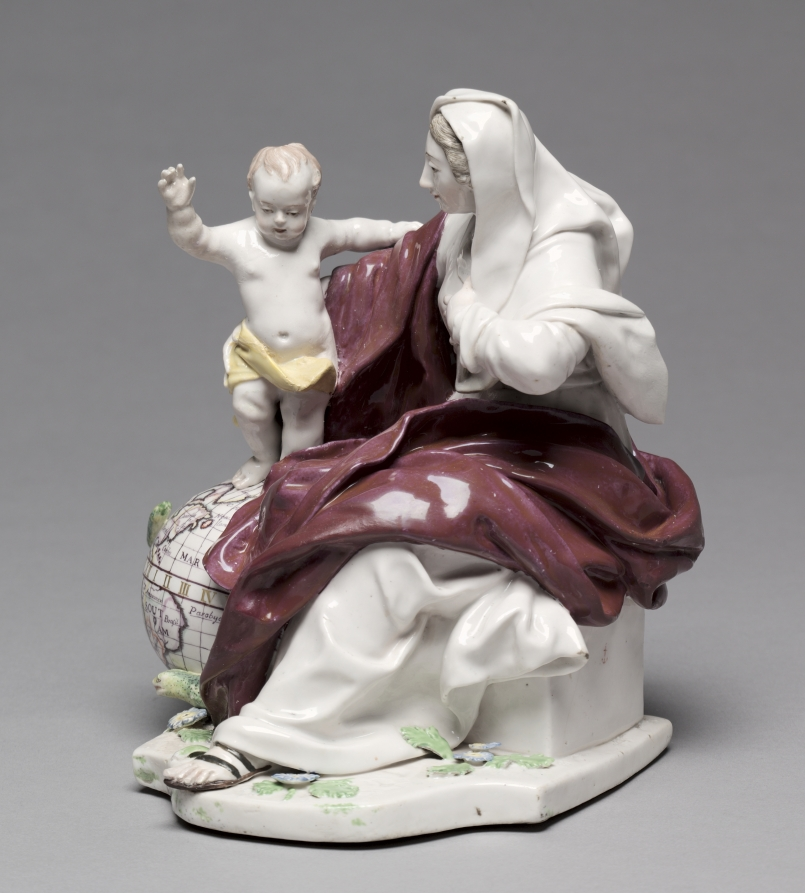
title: Madonna and Child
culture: England, Chelsea, 18th century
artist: Chelsea Porcelain Factory (Britain, London, 1745–84)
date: c. 1755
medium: porcelain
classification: Ceramic